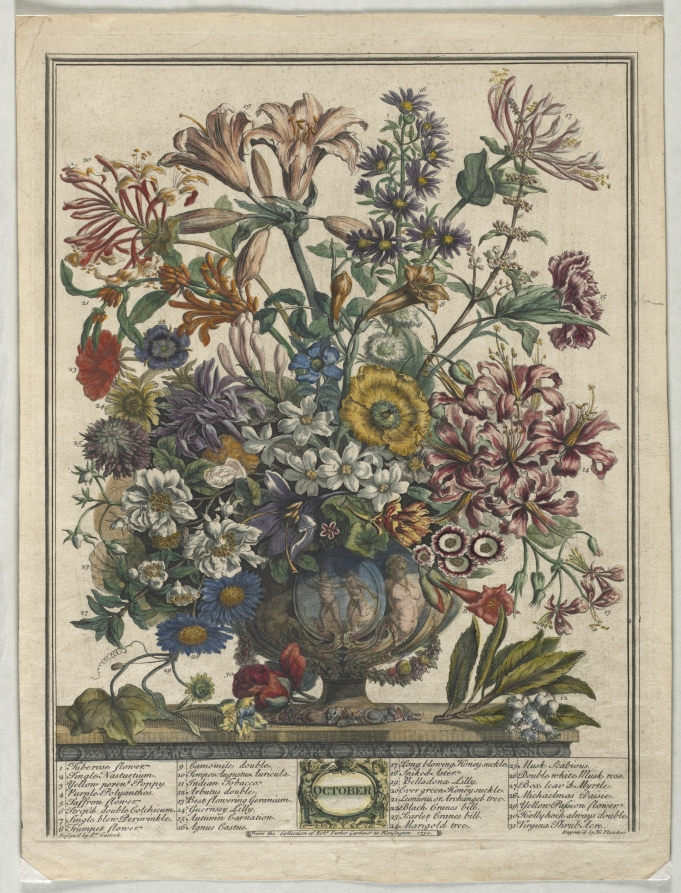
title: Twelve Months of Flowers: October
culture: England, 18th century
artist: Henry Fletcher (British, active 1715–38)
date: 1730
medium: engraving, hand-colored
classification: Print